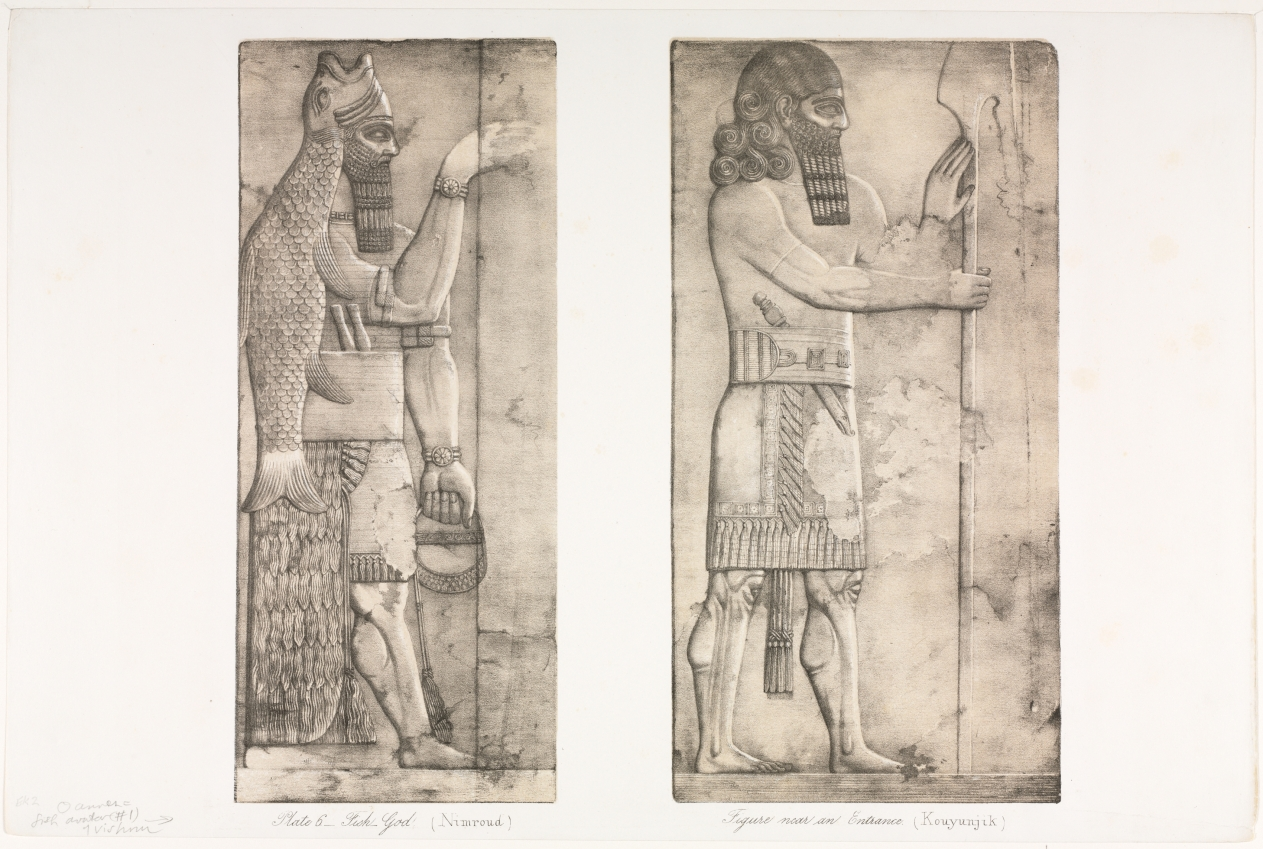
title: Monuments of Ninevah: Plate 6, Fish-god (Nimroud); Figure near an Entrance (Kouyunjik)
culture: England, 19th century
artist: Austen Henry Layard (British, 1817–1894)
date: 1853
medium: lithograph in black and beige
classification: Print